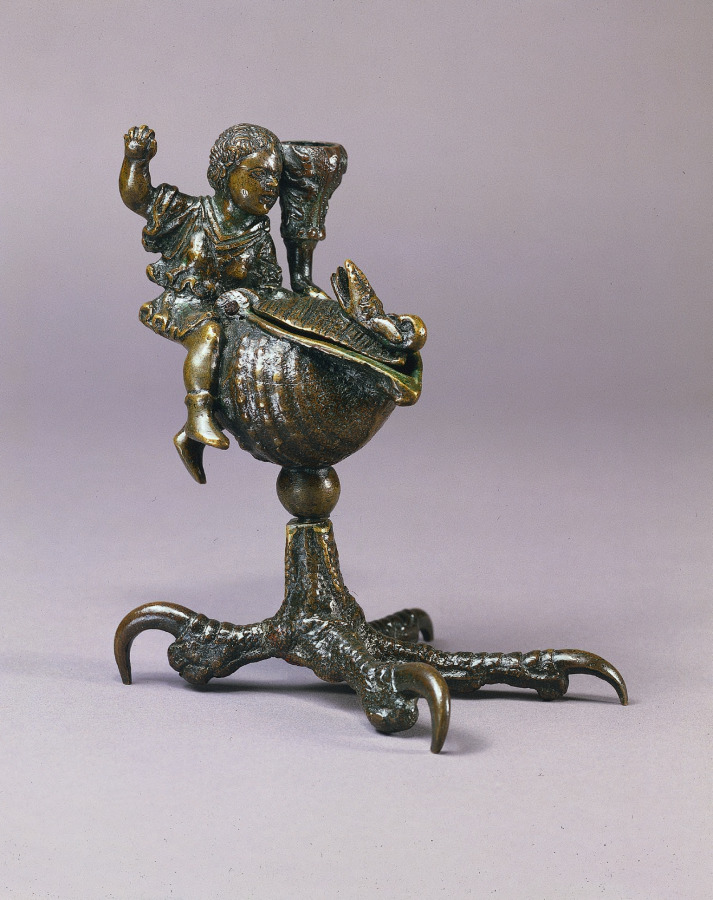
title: Inkwell and Candlestick with the Infant Hercules Killing the Serpents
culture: Italy, Ravenna, 16th century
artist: workshop of Severo da Ravenna (Italian, c.1496–c.1543)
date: c. 1510–20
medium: bronze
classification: Sculpture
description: In the early 1500s, Padua, a center of strong humanist traditions, encouraged the revival of classicism, and artists took their cues from descriptions in the works of classical authors. Classical small-scale bronzes grew in demand, and in response, the city's bourgeoning foundries produced a varied and extensive supply of small statues. Like many early Paduan bronzes, this work's utilitarian function—used to hold ink and to supply light—is complimented by its ornamental value. The base consists of an eagle claw, cast from life, supporting an equally realistic nautilus shell. Though medieval artists had occasionally used seashells to hold paints, the shell inkwell, whose small size makes it rather impractical to use, was a motif particular to Padua. Perched upon the shell is most likely Hercules, the son of Zeus. Perhaps aided by a staff (now missing) he is poised to strike a serpent, which according to myth was sent by Hera, the jealous wife of Zeus, to kill him. The dramatic opposition of hero and monster enhances the connection to the classical past, further meeting the desires of the educated patrons of Padua.